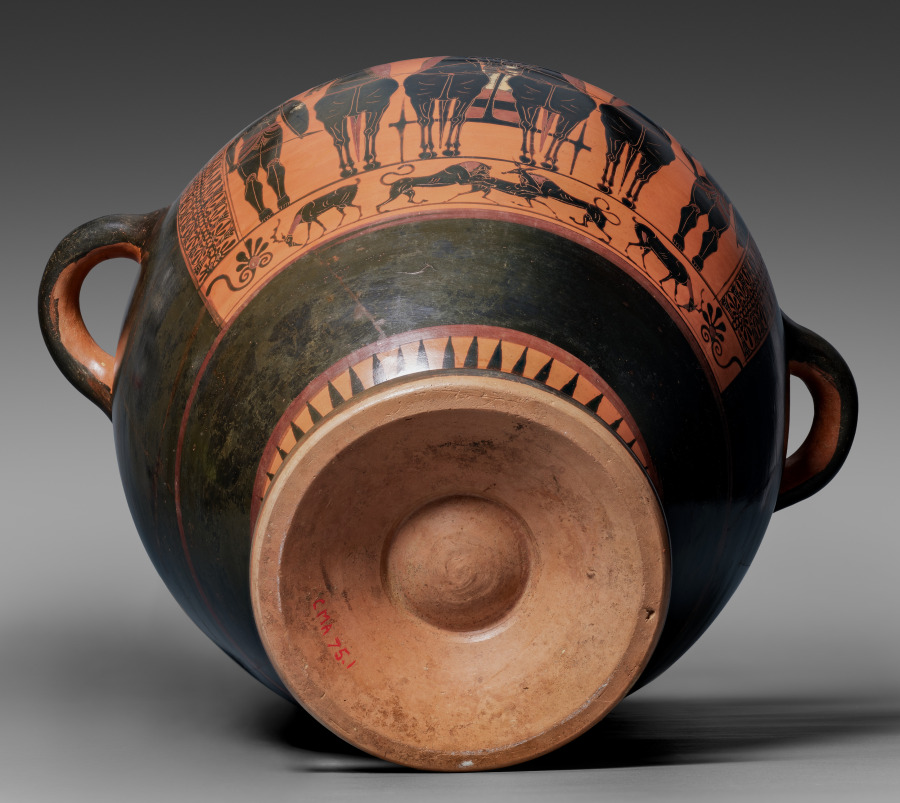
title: Black-Figure Hydria (Water Vessel): Frontal Quadriga (Body); Theseus and Minotaur (Shoulder)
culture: Greece, Attic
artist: attributed to Antimenes Painter (Greek, Attic, active c. 530–510 BCE)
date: c. 520 BCE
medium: ceramic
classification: Ceramic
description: Although their subjects differ, the three fields of figured decoration on this vessel relate to one another metaphorically through the theme of victory. Just as Theseus defeats the Minotaur on the shoulder, two lions converge on a deer in the predella (the small, lowermost panel). In the largest panel, victory is still to come, presumably for all three warriors shown: one in the chariot behind his driver, and one on foot on either side. Somewhat unusually, two of the warriors look directly out at the viewer, their frontal faces an interesting complement to the much more common frontal chariot.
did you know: This type of water vessel, a hydria, takes its name from hudor, Greek for water (and still familiar in the English root hydro).